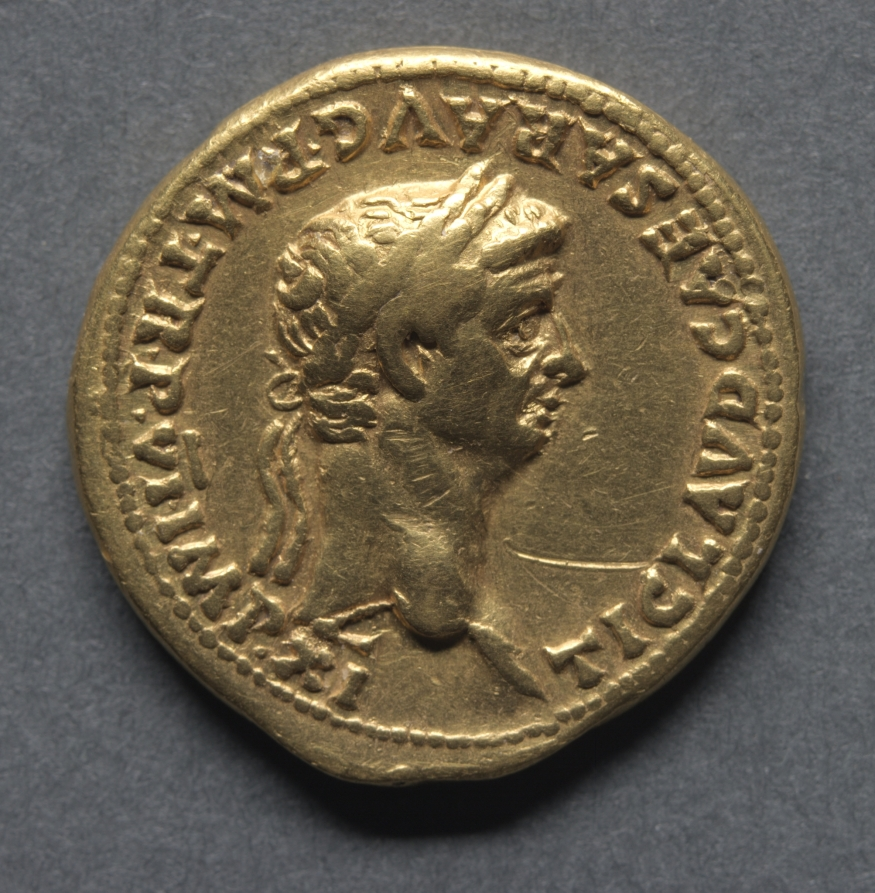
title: Aureus: Bust of Claudius I (obverse)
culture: England, Roman, Claudius I (41–54 CE)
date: 47–48 CE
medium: gold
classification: Coins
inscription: TI. CLAVD. CAESAR. AVG. P. M. TR. P.. VI. IMP. XI.